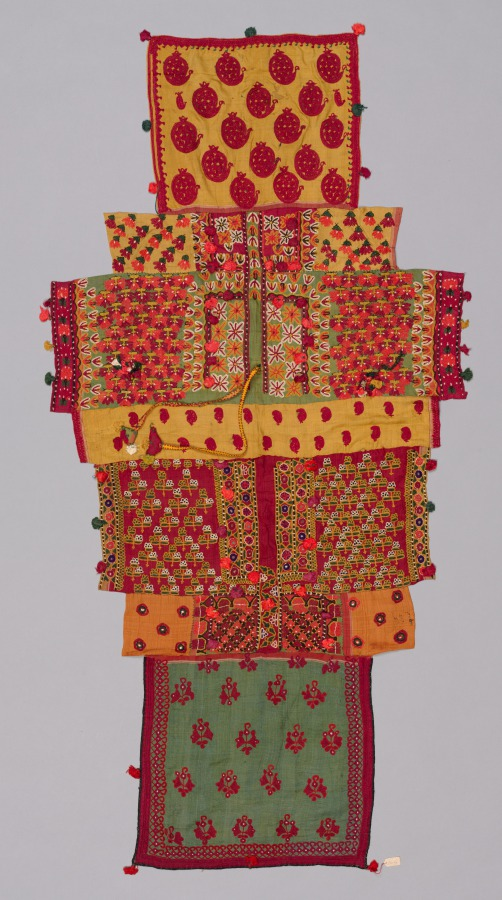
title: Fragments sewn together to form Cover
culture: Western India, Gujarat, Kachchh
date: 1800s–early 1900s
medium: silk thread on silk ground, embroidery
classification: Embroidery